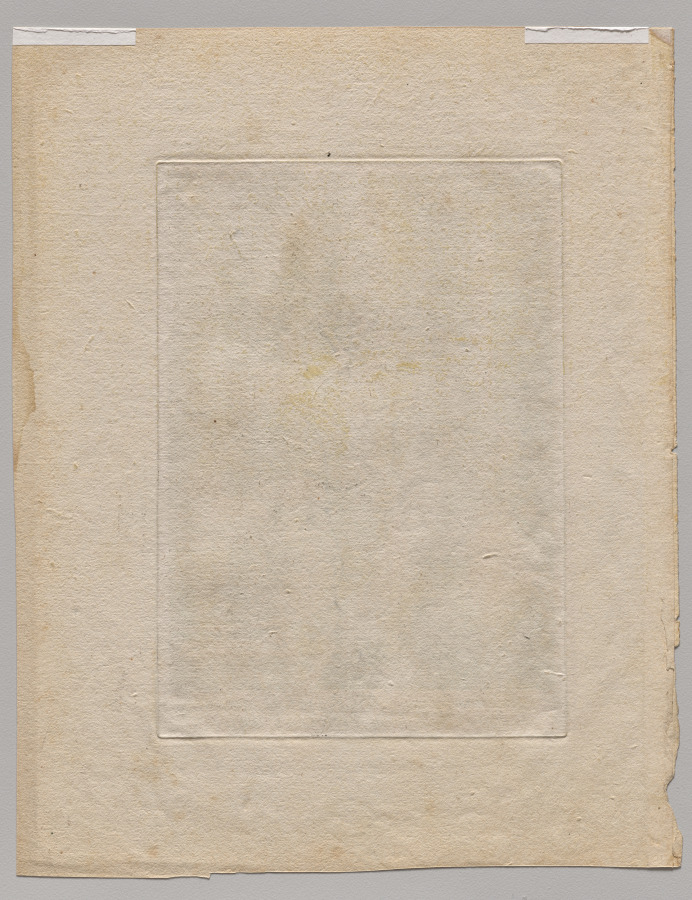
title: Plate 9: Asher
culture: Netherlands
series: The Twelve Sons of Jacob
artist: Jacob de Gheyn II (Netherlandish, 1565–1629)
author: after Karel I van Mander (Netherlandish, 1548–1606)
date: c. 1589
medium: engraving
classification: Print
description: In this print, the biblical figure Asher holds a basket of potatoes and sheaf of wheat, denoting the rich soil and abundant food produced by his tribe. This is one of a series of prints depicting the twelve sons of Jacob, each with an attribute and costume that denotes his character. According to the Old Testament, Jacob blessed each of his twelve sons, prophesizing the destiny of their tribe, and assigning them a parcel of land in Canaan. The print series was made in the Netherlands in the late 16th century, a time of political struggle when Old Testament heroes were popular exemplars of fortitude and patience.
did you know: The castle in the background of this image of Asher, son of Jacob, suggests that food he prepares will be served to kings, as prophesized by his father.